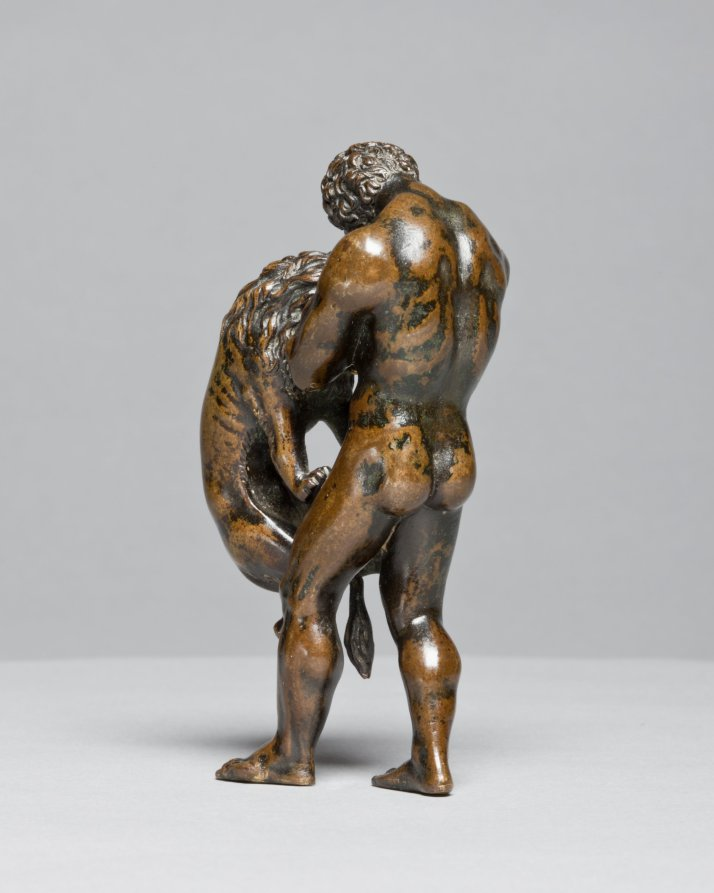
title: Hercules and the Nemean Lion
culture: Italy or France, 16th century or later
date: 1500s or later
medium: bronze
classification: Sculpture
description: The original owner of this work would have understood that this scene referred to the entire story of Hercules, the demi-god who had to accomplish twelve labors. The lion is named after the city of Nemea, near Corinth, a monstrous beast sent by the goddess Hera to wreak havoc on the area. After killing the lion, Hercules wore his pelt, commonly seen in other representations of the hero.